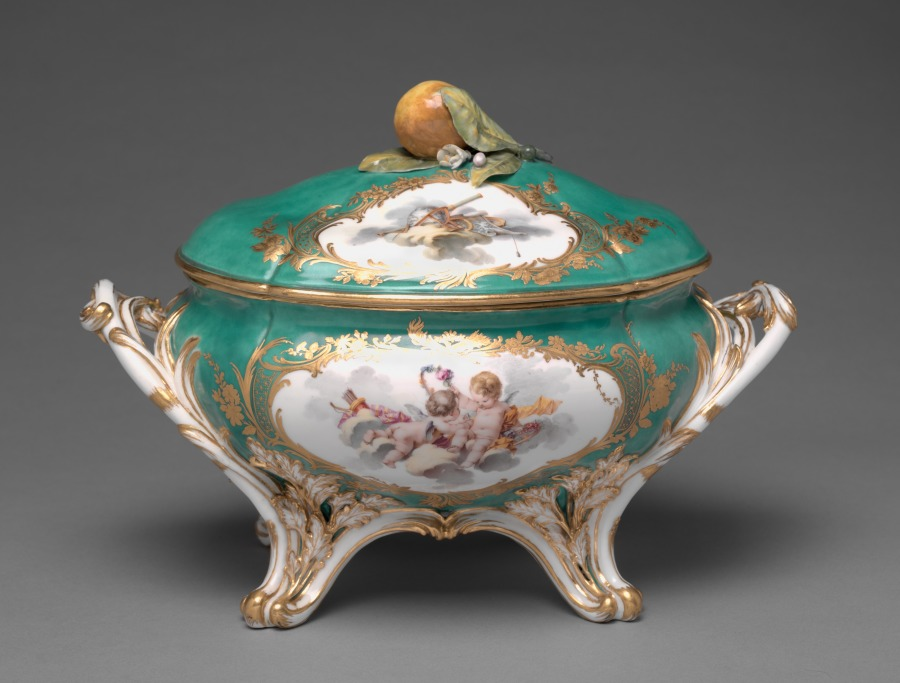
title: Covered Tureen (Terrine du roi)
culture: France, Sèvres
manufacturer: Sèvres Porcelain Factory (French, est. 1756)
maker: attributed to Charles Nicolas Dodin (French, 1734–1803)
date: 1756–57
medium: soft-paste porcelain with enamel and gilt decoration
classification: Ceramic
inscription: [Interlaced L's]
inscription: [Date letter 'D' (in cursive with a dot on either side)]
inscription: [Incised 'b']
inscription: [Incised '6']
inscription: [Inventory numbers in red enamel]: "r.u./710" [base of tureen]; "r.u./710a" [on lid]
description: This tureen’s striking green background, or fond vert, was a major advancement for the Sèvres Porcelain Factory, known for their innovation in and mastery of color. Traditionally the largest, most expensive item in an 18th-century French dinner service, this tureen was part of a porcelain dining set presented to King Frederick V of Denmark by French King Louis XV in 1758.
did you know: French King Louis XV was a great patron of the decorative arts; he acquired the Sèvres Porcelain Factory in 1759.